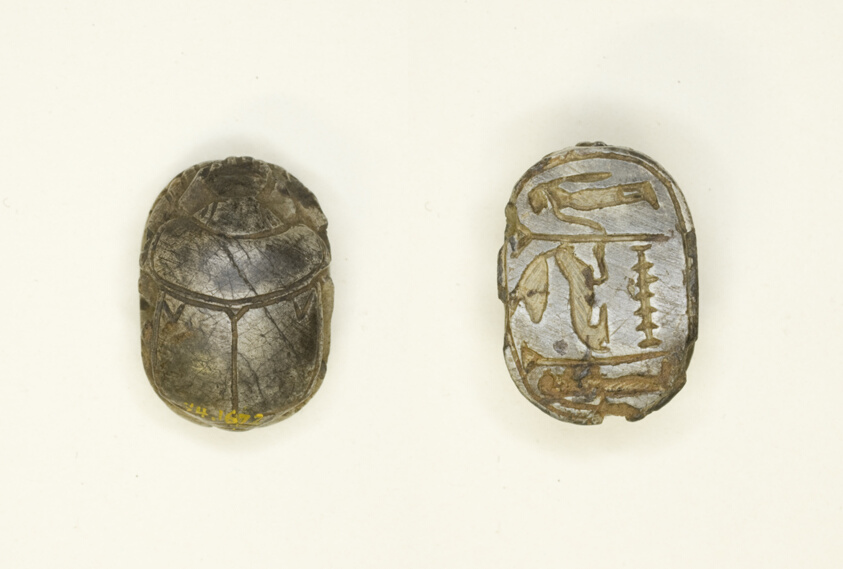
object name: Costume and Accessories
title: Scarab: Wish Formula (?)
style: egyptian, ancient, late period (egyptian), third intermediate period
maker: Egyptian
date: Third Intermediate Period–Late Period, Dynasties 21–30 (about 1069–343 BCE)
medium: Stone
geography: Egypt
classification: scarab; ancient art; costume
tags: Hieroglyphs, goddesses, insects